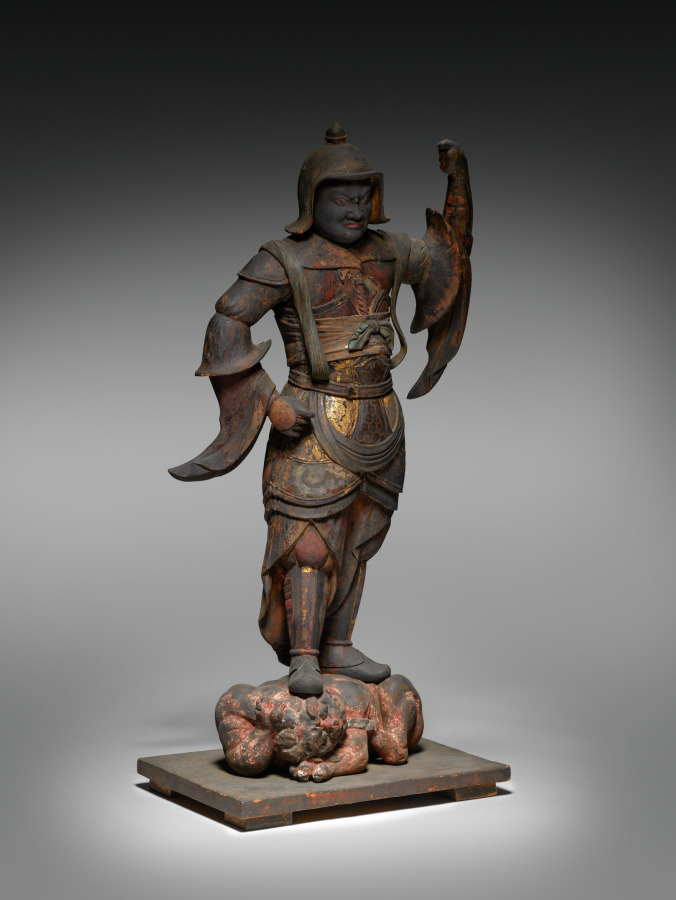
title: Guardian Figure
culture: Japan, Heian period (794–1185)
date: 1000s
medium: wood with polychromy and kirikane (cut-gold)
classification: Sculpture